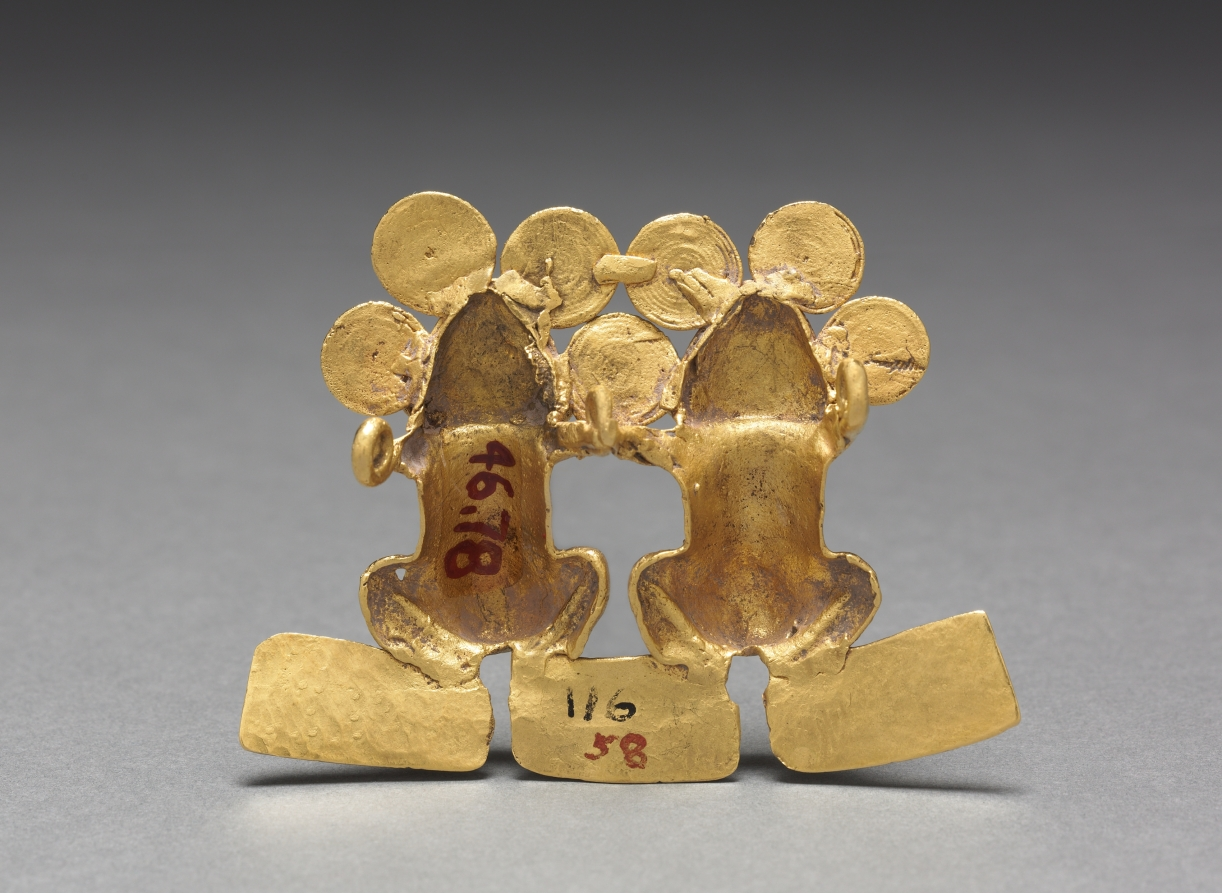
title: Double Frog Pendant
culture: Western Panama, Veraguas-Gran Chiriquí Style, 11th-16th century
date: c. 1000–1550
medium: cast and hammered gold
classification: Metalwork